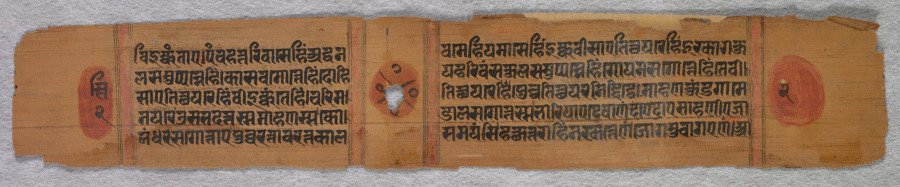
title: Text: Folio 2 (verso), from a Kalpa-sutra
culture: Western India, Gujarat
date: c. 1275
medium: gum tempera and ink on paper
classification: Painting